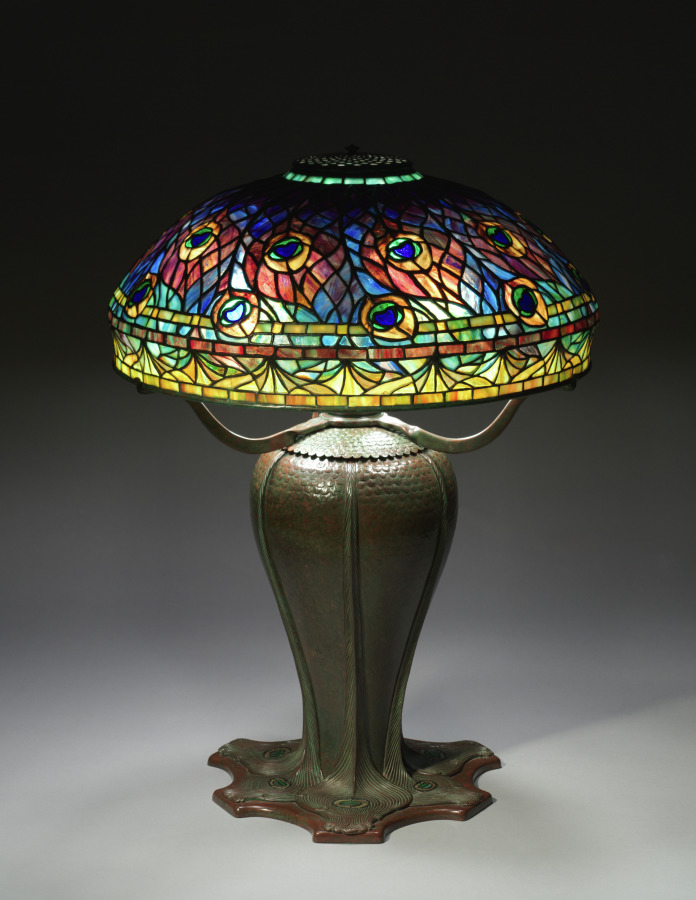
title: Peacock Table Lamp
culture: America, New York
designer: probably by Clara Wolcott Driscoll (American, 1861–1944)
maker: Tiffany Studios (United States, New York, 1902–32)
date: c. 1902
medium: Leaded glass, bronze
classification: Lamp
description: The peacock, with its brilliantly colored iridescent plumage, was a favorite motif of Louis Comfort Tiffany, appearing in almost every genre of his artistic production. The Peacock table lamp, created by Tiffany's chief lamp designer Clara Wolcott Driscoll, evokes the wide circular swath of a peacock's preening feathers and attracted critical acclaim to both Driscoll and Tiffany Studios. This particular version retains its original kerosene burning fluid apparatus as well as an electric bulb armature. Although incandescent lamp bulbs had become more widely available in the 1890s, most households, even those of the wealthy, were not yet wired for electricity. Tiffany originally designed his lamps with an oil-burning apparatus, consisting of a reservoir and a double wick and chimney, as well as an electric attachment. He cleverly predicted, though, that electric households would eventually become commonplace, so he soon moved to all-electric designs, greatly increasing the illumination and appeal of his lamps.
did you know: Originally designed to burn kerosene, this Peacock lamp still retains its original double wick and oil reservoir along with an adapter for electric light bulbs.